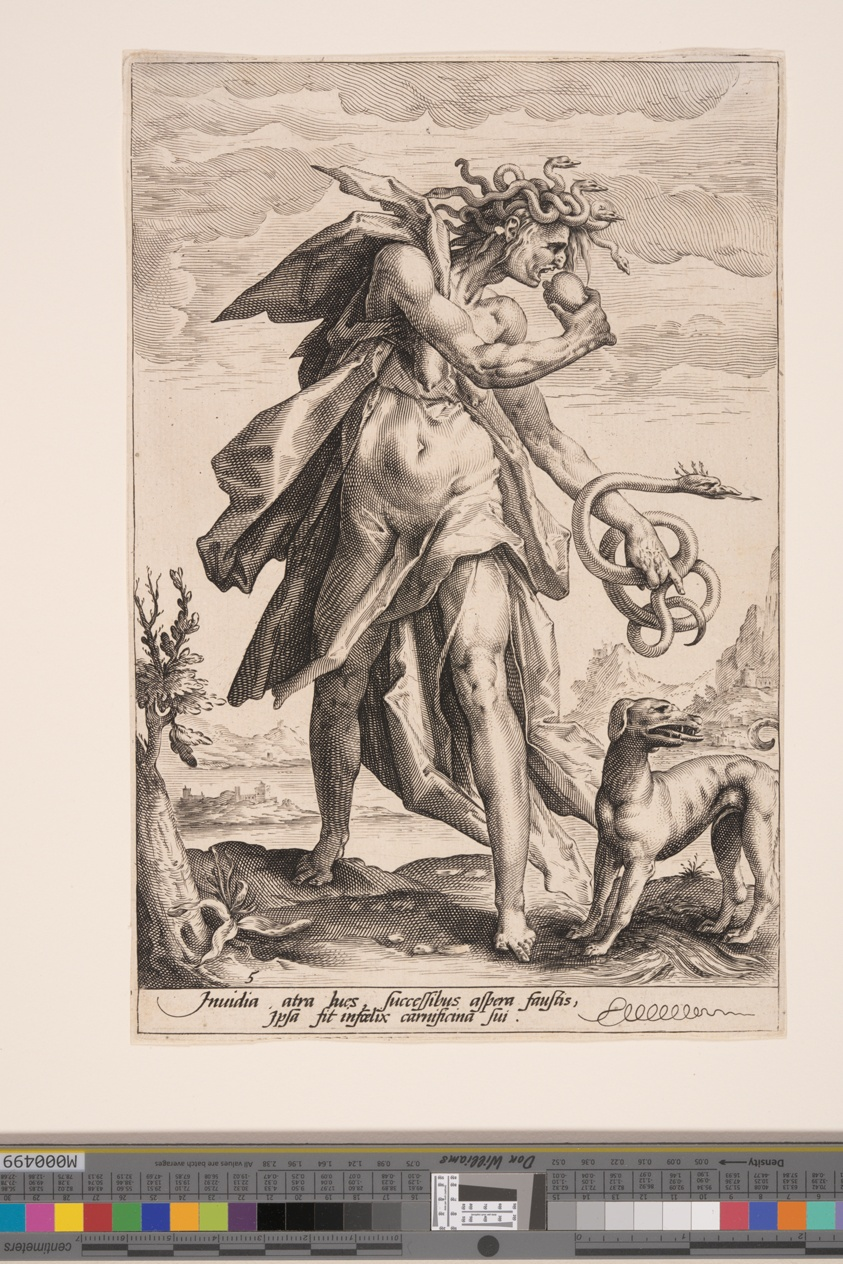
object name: Print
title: Envy, plate 5 from The Vices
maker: Jacob Matham (Dutch, 1571–1631); after Hendrick Goltzius (Dutch, 1558–1617)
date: c. 1587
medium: Engraving on laid paper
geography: Netherlands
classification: print; engraving; paper; prints and drawing